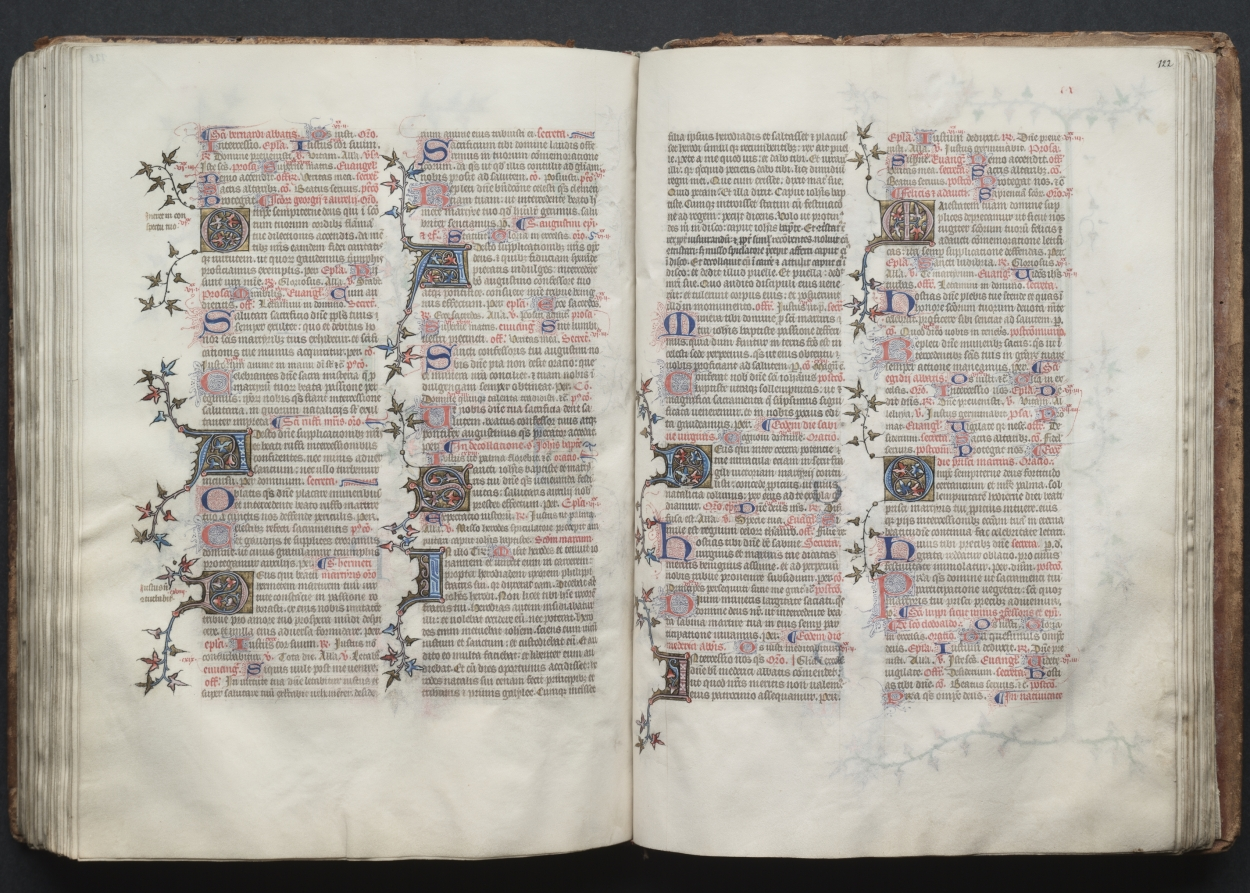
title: The Gotha Missal: Fol. 121v, Text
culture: France, Paris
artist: Master of the Boqueteaux (French)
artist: and Workshop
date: c. 1375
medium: ink, tempera, and gold on vellum; blind-tooled leather binding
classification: Bound Volume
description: The style and quality of this manuscript's decoration is typical of deluxe Parisian books made for aristocratic or royal patrons. Most of the book's decoration appears to be the work of the Master of the Boqueteaux, an artist active at the court of King Charles V (died 1380). His style was apparently shared by a number of book illuminators working in and around Paris. It is very possible that the Gotha Missal belonged to Charles V, but is not provable because the manuscript has no royal portraits and lacks a colophon. Given the book's magnificent decoration, however, it would seem that it was produced for a Valois prince, if not for the king himself. The manuscript receives its name from the German dukes of Gotha, its later owners.